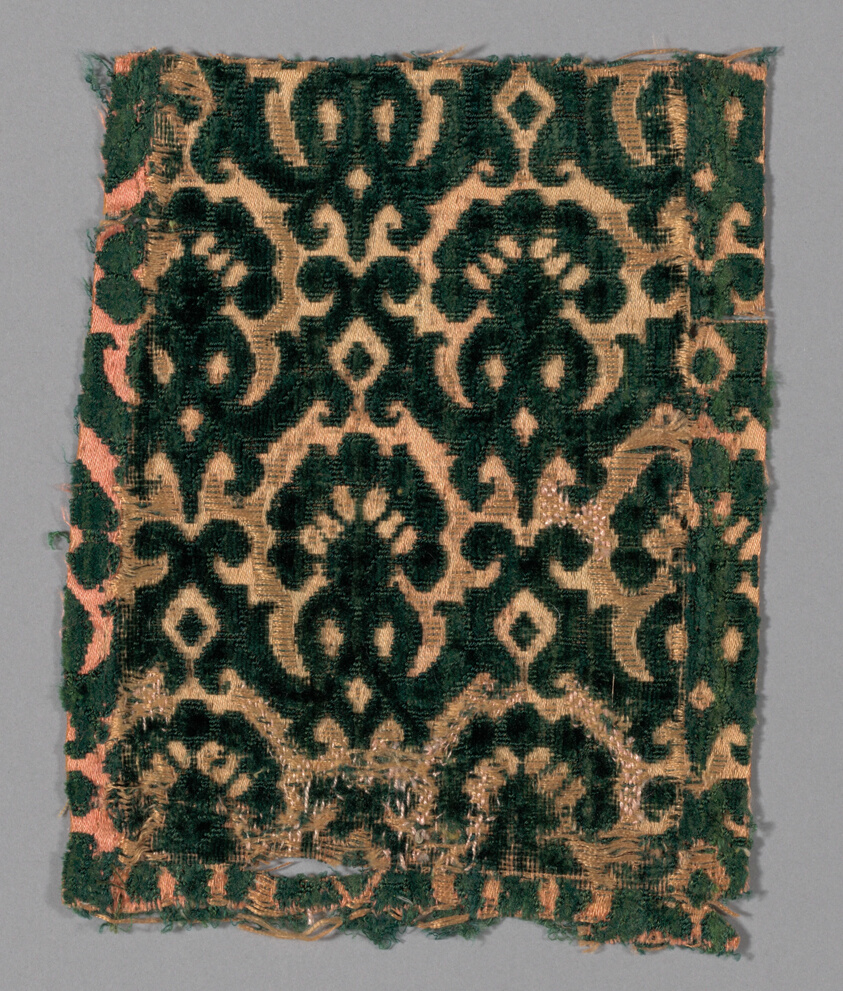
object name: Textile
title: Fragment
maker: Italy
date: 1600/1650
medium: Cisele voided satin velvet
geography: Italy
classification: textile; weaving; weaving - velvet